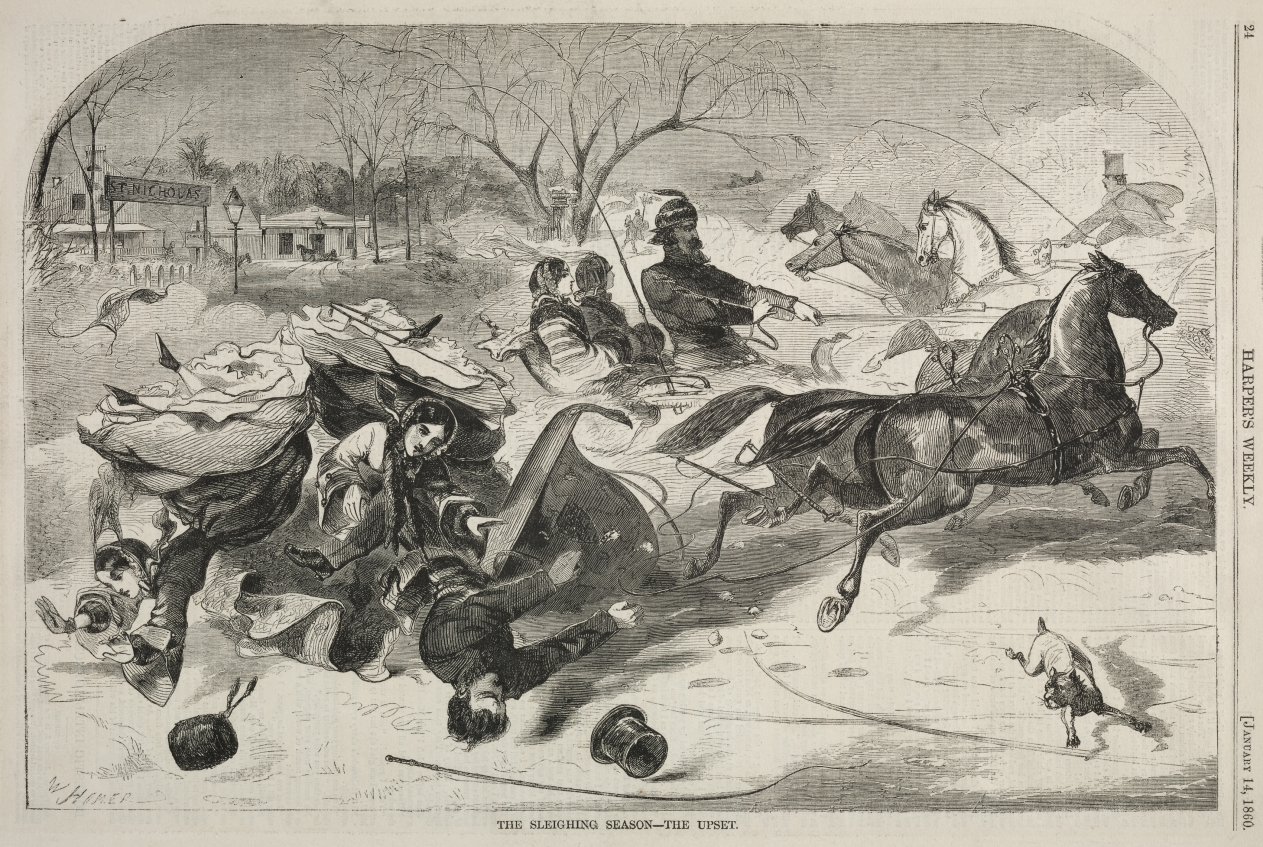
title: The Sleighing Season - The Upset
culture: America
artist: Winslow Homer (American, 1836–1910)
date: 1860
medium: wood engraving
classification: Print